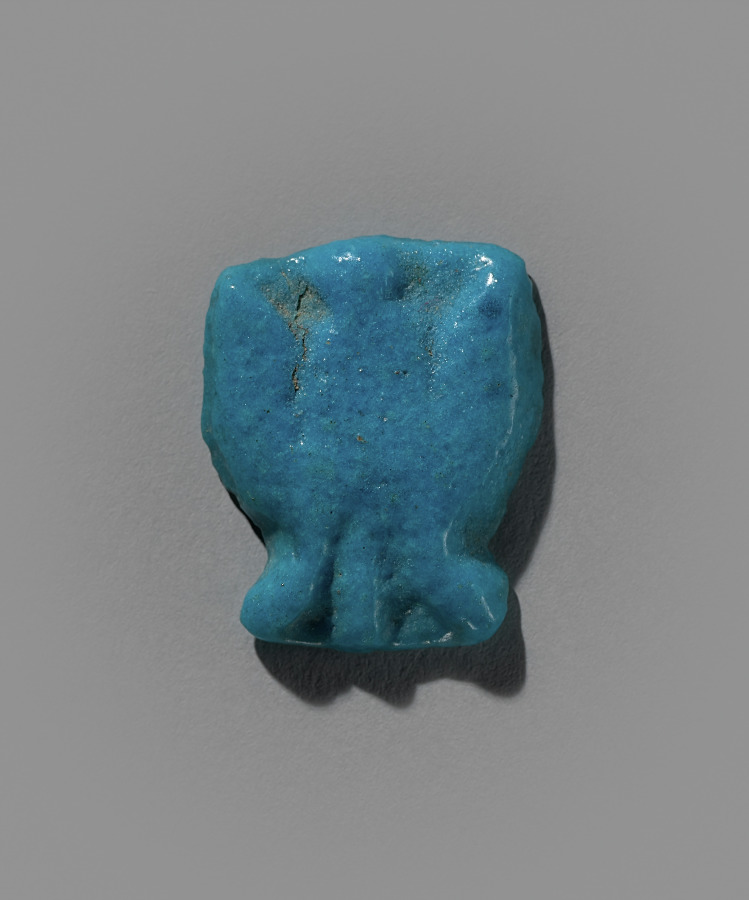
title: Food Model Amulet: Brace of Duck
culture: Egypt, New Kingdom (1540–1069 BCE), Dynasties 19–20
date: 1295–1069 BCE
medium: turquoise faience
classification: Amulets